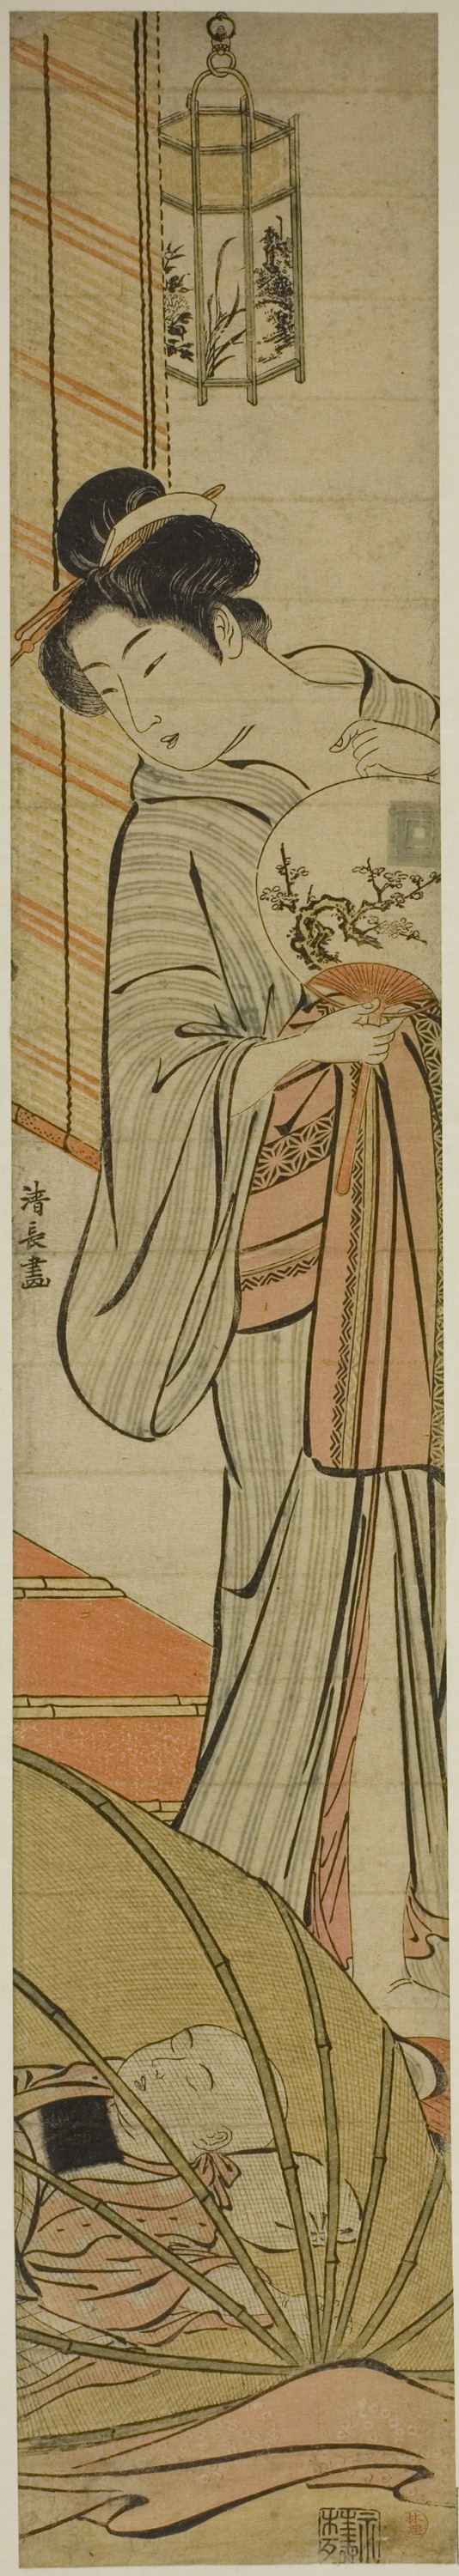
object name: Print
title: Mother Watching her Son Sleeping under a Mosquito Net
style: Japanese (culture or style)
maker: Torii Kiyonaga (Japanese, 1752-1815)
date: c. 1780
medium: Color woodblock print; hashira-e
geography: Japan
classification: woodblock print; print; asian art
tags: mothers, babies, children, parents